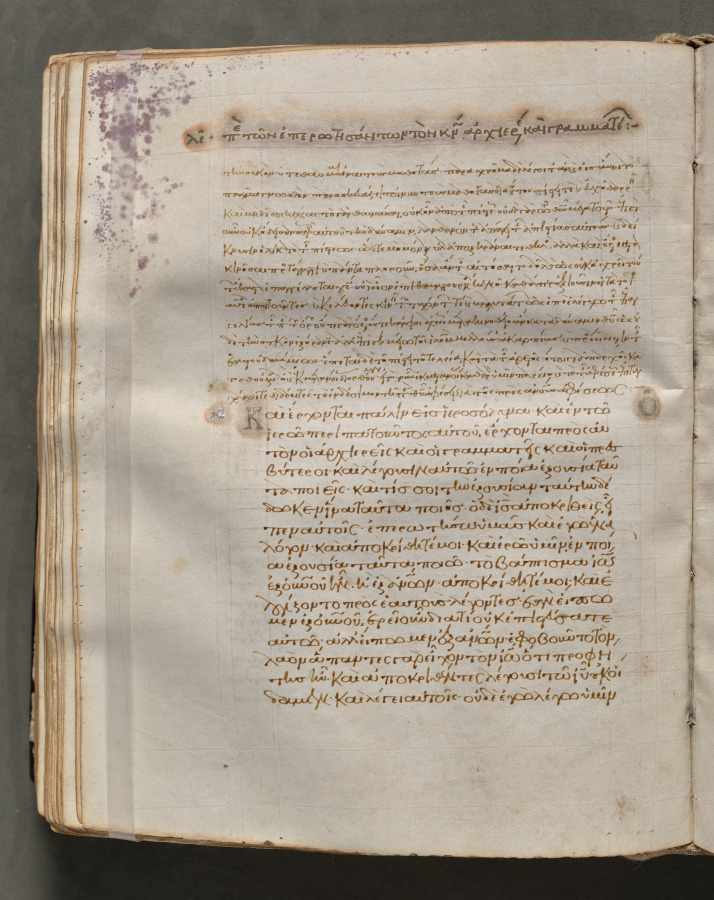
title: Text, folio 175 (verso), from a Gospel Book with Commentaries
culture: Byzantium, Constantinople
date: c. 1000–1100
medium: ink, tempera, and gold on vellum; leather binding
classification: Bound Volume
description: Each of the four gospels in this book opens on a page with brilliantly illuminated borders depicting the author of the text as well as birds-principally peacocks, symbols of the immortality of the soul-and fountains, representing the fountain of life and the salvation of the soul. This volume consists of 428 leaves with texts in Greek. Its level of sophistication suggests that it was probably written and decorated in a monastery in Constantinople.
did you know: Gospel Books were carried in procession through Byzantine churches.